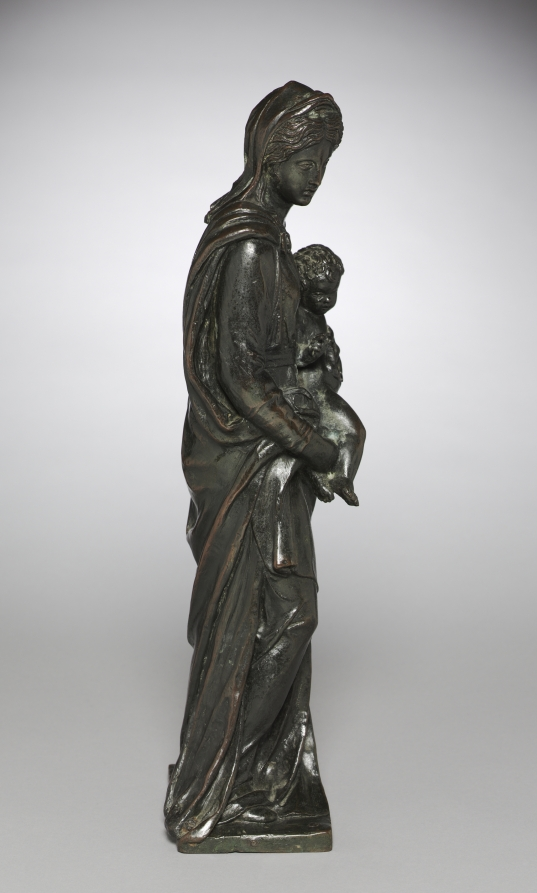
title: Virgin and Child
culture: Italy, 16th century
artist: Jacopo Sansovino (Italian, 1486–1570)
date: early 1530s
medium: bronze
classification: Sculpture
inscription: inscribed across the front of the base: IACOBVS SANSOV.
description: This statue is a scaled-down version of a marble figure the sculptor and architect Jacopo Sansovino carved for the funerary monument of a nobleman in Verona, Italy. Balancing the stable mass of the Virgin with the seemingly weightless, elongated child draped gracefully across her torso, the composition illustrates Sansovino’s skill. After training in Florence, he relocated to Rome before eventually settling in Venice in 1527. Sansovino contributed significantly to public and private projects across the region, from important civic buildings and tomb sculpture to intimately scaled bronzes, such as this example from his early Venetian period.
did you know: Sansovino's signature on the base—uncommon for bronzes of this period—marks this as a work of particular importance.